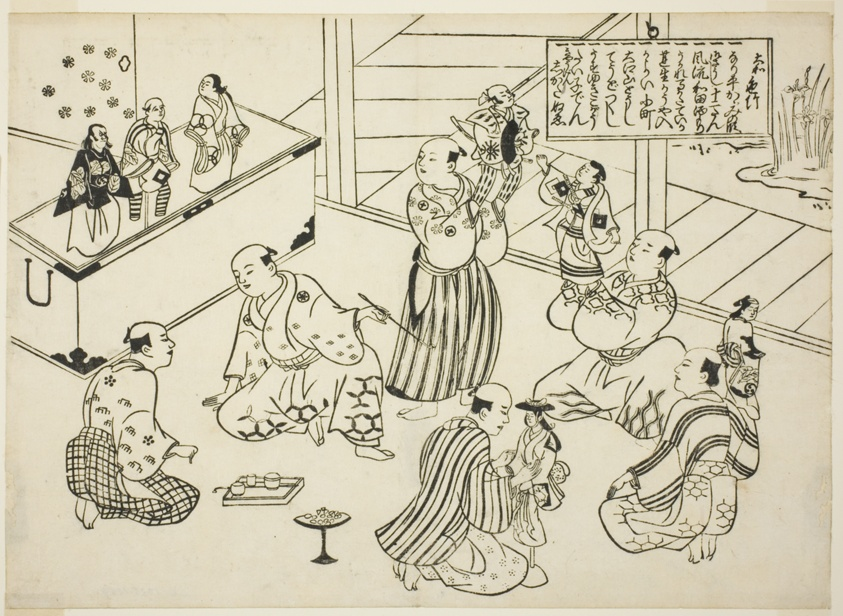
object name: Print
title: The Dressing Room of a Puppet Theater, the table of contents from the series "Famous Scenes from Japanese Puppet Plays (Yamato irotake)"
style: Japanese (culture or style)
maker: Okumura Masanobu (Japanese, 1686-1764)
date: c. 1705/06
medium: Woodblock print; oban, sumizuri-e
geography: Japan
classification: woodblock print; print; asian art; woodblock